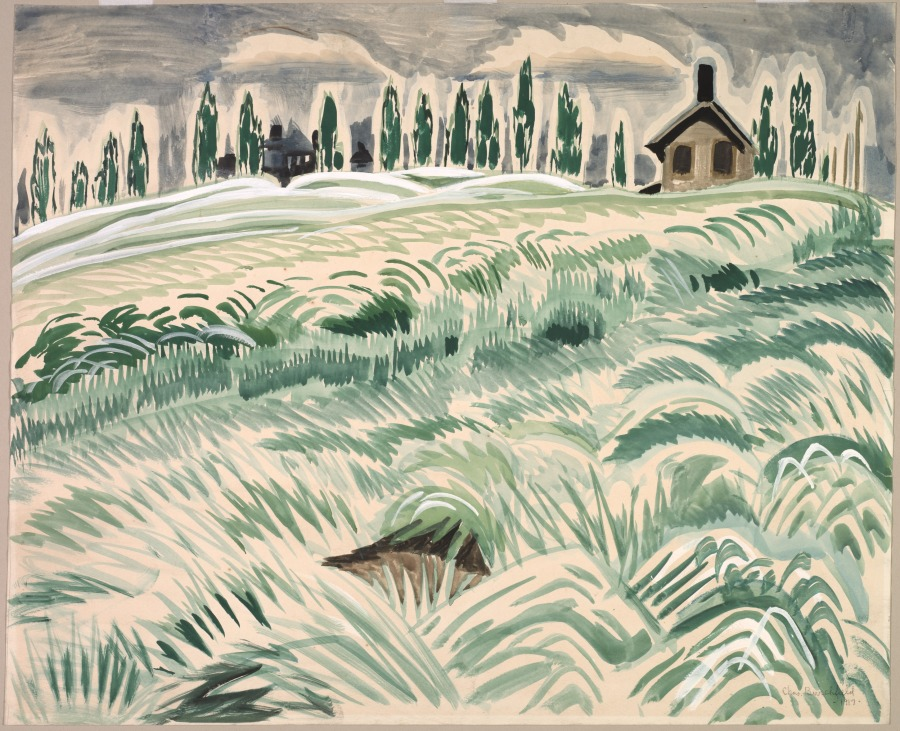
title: Hillside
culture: America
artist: Charles Burchfield (American, 1893–1967)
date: May 24, 1917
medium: Watercolor and opaque watercolor on Strathmore wove paper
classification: Drawing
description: Burchfield was especially drawn to watercolor and experimented avidly with it throughout his entire career. This portable medium allowed him to explore the landscape and continuously rework his compositions. Here, he used shades of green to depict the countryside near his hometown, Salem, Ohio.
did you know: This drawing was made during 1917, which Burchfield describe as his "golden year," the most prolific period of his entire career.